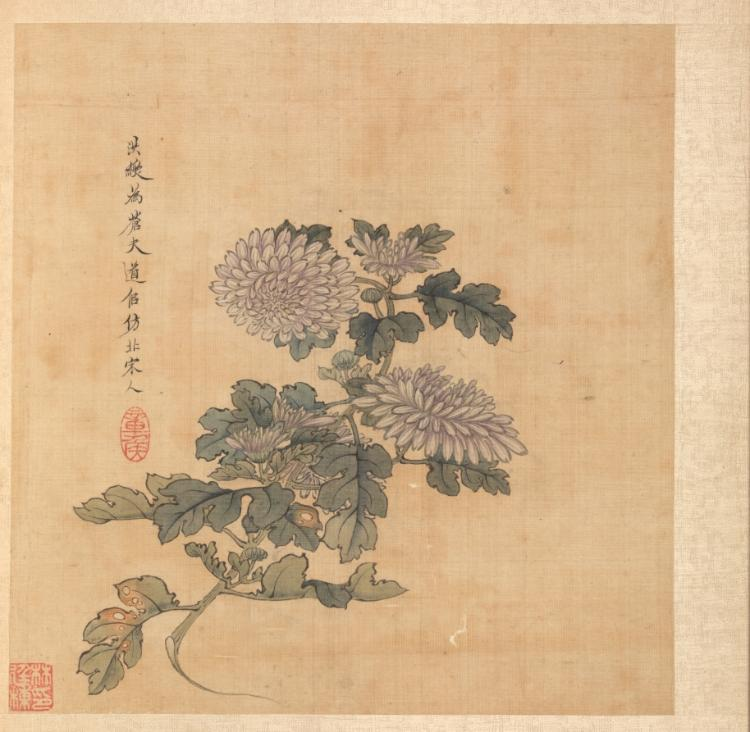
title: Paintings after Ancient Masters: Chrysanthemum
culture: China, Ming dynasty (1368–1644)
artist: Chen Hongshou (Chinese, 1598/99–1652)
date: 1598–1652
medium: Album leaf; ink and color on silk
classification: Painting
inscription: Hongshou painted in imitation of the Northern Song style for Daoist friend, Cangfu. [seal] Zhanghou 章侯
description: Poet Tao Yuanming (365–427 CE) turned down a career as an official in politically turbulent times to return to his home estate, northwest of Mount Lu, to write poetry and enjoy his garden and wine. As he grew chrysanthemums, Tao is associated with this flower. The artist Chen Hongshou, active in Zhejiang province, suffered through the violent transition from the Ming to the Qing dynasty around 1644. This painting of chrysanthemums alludes to the poet who lived a millennium earlier during similarly fraught times.